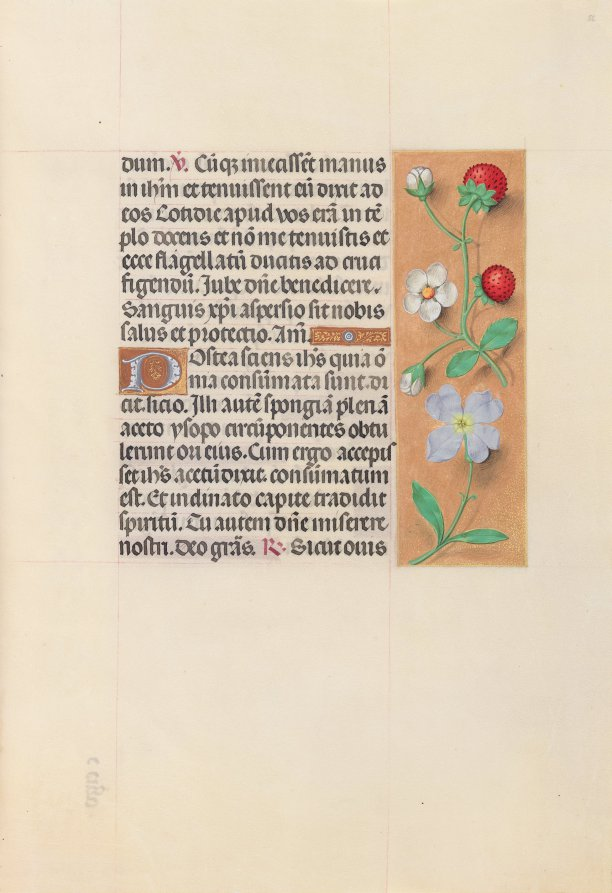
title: Hours of Queen Isabella the Catholic, Queen of Spain: Fol. 55r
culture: Flanders, Ghent and Bruges, late 15th century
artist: Master of the First Prayerbook of Maximillian (Flemish, c. 1444–1519)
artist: and Associates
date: c. 1500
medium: ink, tempera, and gold on vellum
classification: Bound Volume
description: This manuscript was illuminated by a circle of at least five highly organized manuscript painters active in the Flemish cities of Ghent and Bruges. The principal illuminator was Alexander Bening, who painted the majority of the book's miniatures. Manuscripts produced by this circle of artists are renowned for the decoration of their borders, which typically feature a rich variety of realistically-painted flowers, birds, and butterflies. This prayer book, called a book of hours, was intended not for a cleric, but for the private devotions of a lay person-in this case, Isabella the Catholic, Queen of Spain (1451-1504). Isabella's coat of arms embellishes the book's frontispiece. It is unlikely that the book was commissioned by the Queen herself; rather, she probably received it as a diplomatic gift from someone courting her patronage, perhaps Cardinal Francisco Jimenez de Cisneros. A Franciscan friar, Jimenez was dependent upon Isabella for his advancement, first to the post of Queen's confessor in 1492, and then to Archbishop of Toledo in 1495.